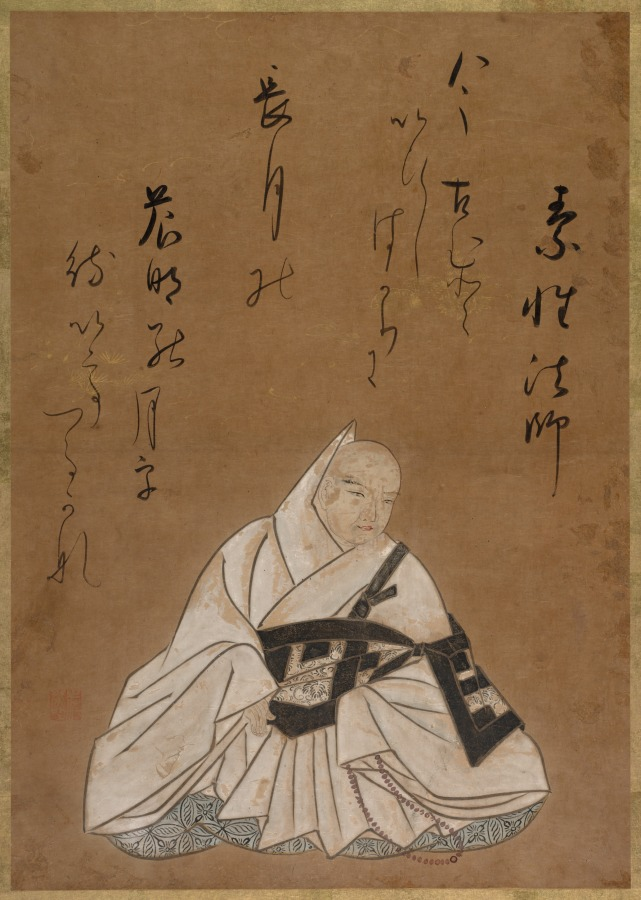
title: The Poet Sōsei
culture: Japan, Edo period (1615–1868)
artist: Shokadō Shōjō (Japanese, 1584–1639)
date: early to mid-1600s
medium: album leaf; ink and color on paper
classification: Painting